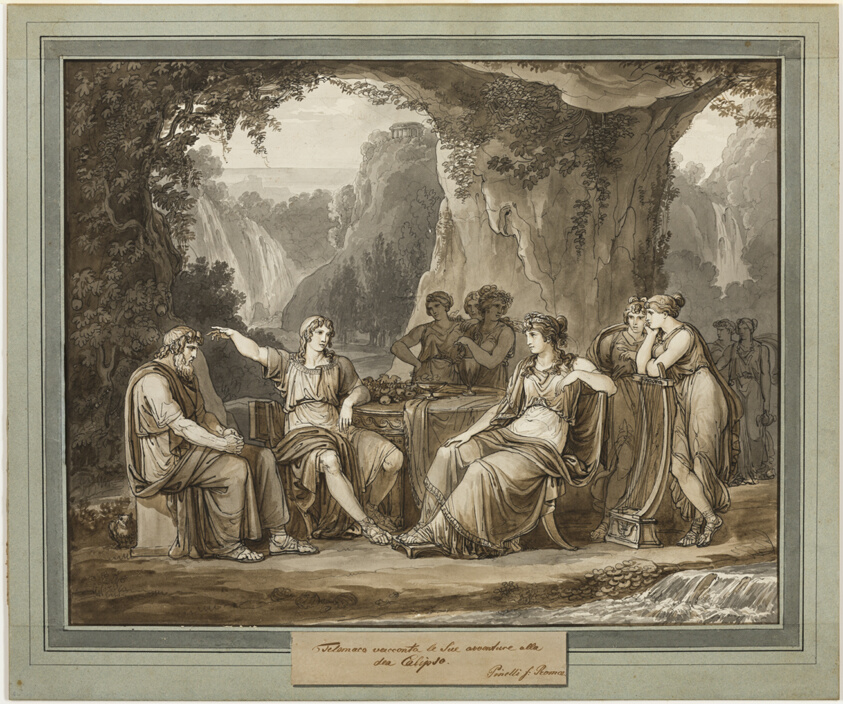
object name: Drawing and Watercolor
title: Telemachus Relates His Adventures to the Goddess Calypso, from The Adventures of Telemachus, Book 1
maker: Bartolomeo Pinelli (Italian, 1781-1835)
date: 1808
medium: Pen and black ink with brush and gray and brown wash, with traces of black chalk, on ivory laid paper, laid down on board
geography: Italy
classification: drawings (visual works); prints and drawing